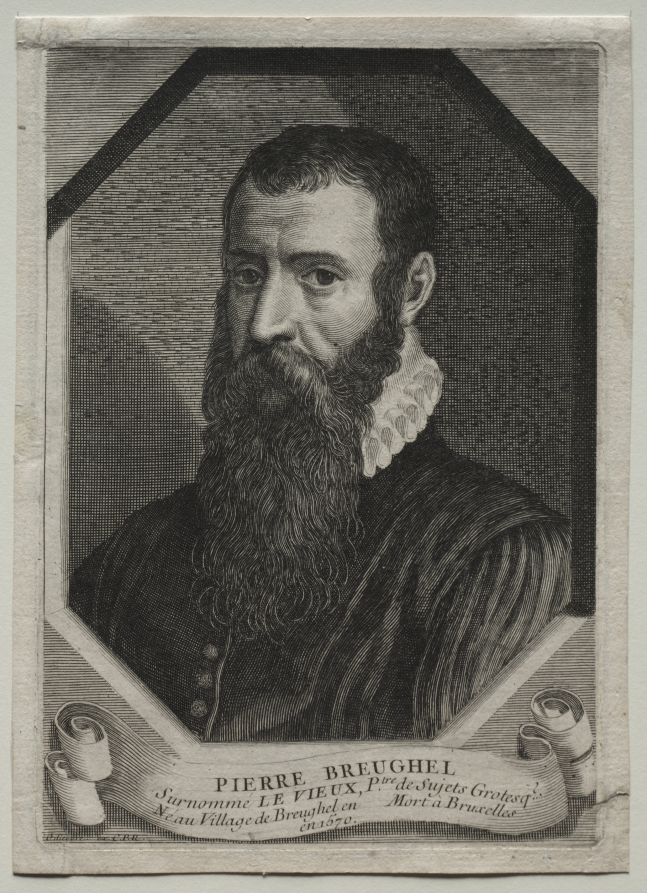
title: Peter Breughel the Elder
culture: France, 18th century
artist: Michel Odieuvre (French, 1687–1756)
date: early–mid-1700s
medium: engraving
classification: Print